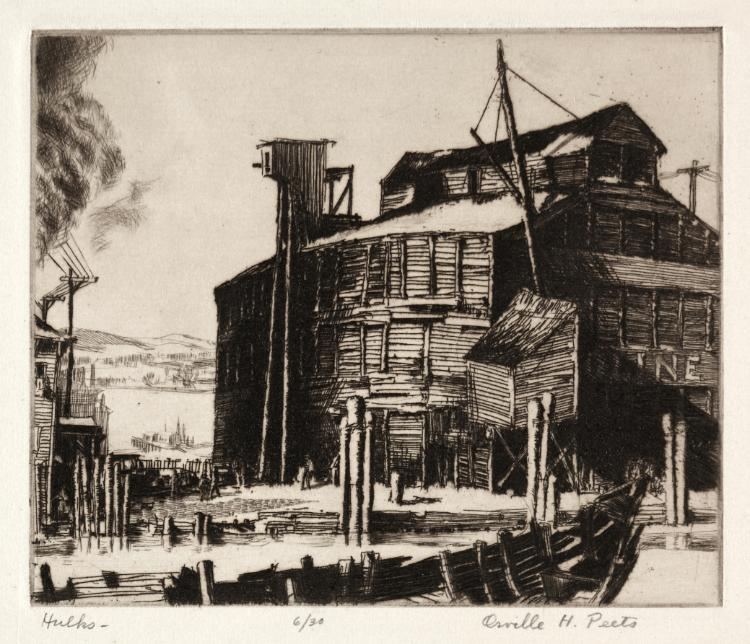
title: Hulks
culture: America, Ohio, Cleveland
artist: Orville Houghton Peets (American, 1884–1968)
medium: etching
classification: Print